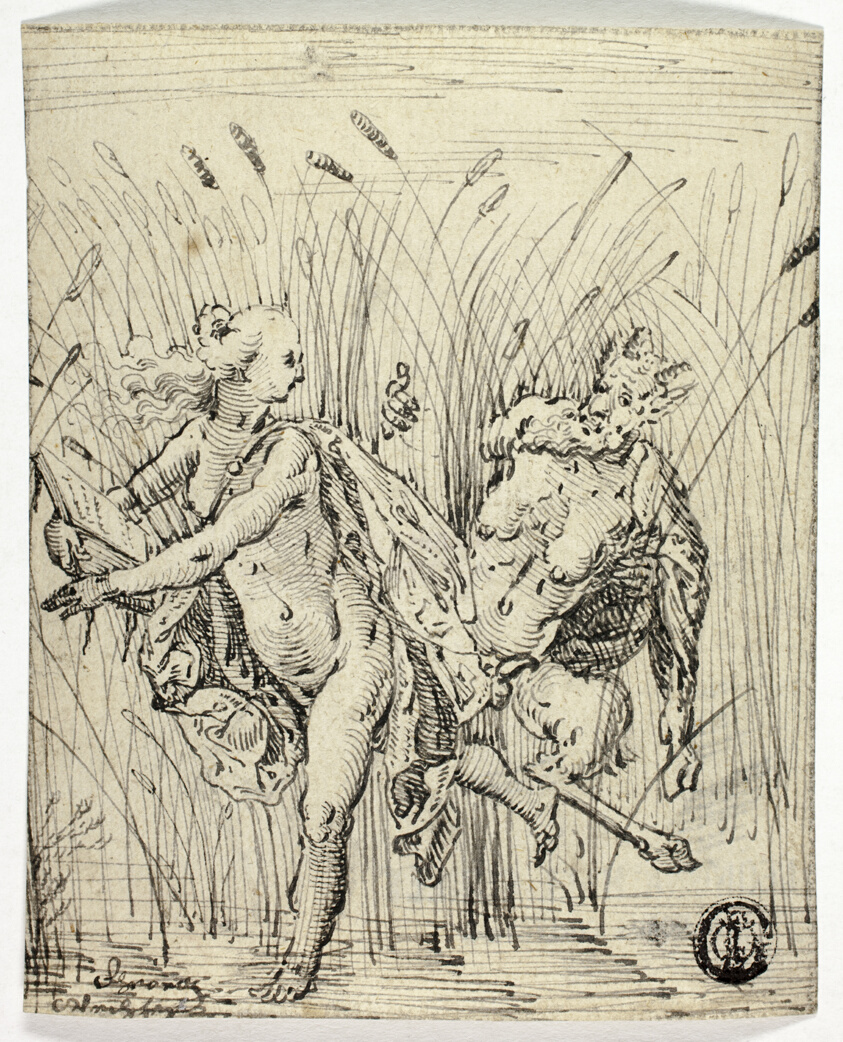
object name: Drawing and Watercolor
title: Pan and Syrinx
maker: Unknown Artist; Southern German, late 16th century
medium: Pen and black ink on tan laid paper, tipped onto tinted laid paper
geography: Germany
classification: pen and ink drawings; drawings (visual works); prints and drawing